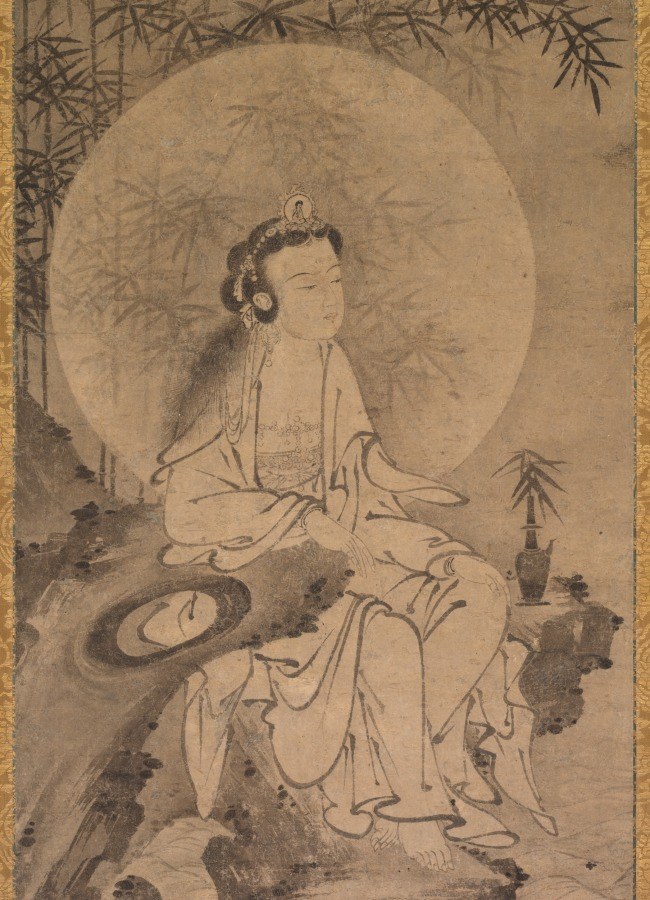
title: White-Robed Guanyin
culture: China, Southern Song dynasty (1127-1279)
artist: attributed to Zhang Yuehu (Chinese, active 1200s)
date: late 1200s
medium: Hanging scroll; ink on paper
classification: Painting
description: The figure here sits on a rocky elevation representing Potalaka in the Southern Sea, Avalokitesvara’s island home. A vase with a bamboo sprig holds pure water, the nectar of life. Bamboo shines through the figure’s halo, a way of seeing the illusionary world through the Buddhist truth. Avalokitesvara (Guanyin in Chinese), the bodhisattva of compassion, was integrated into the Chan Buddhist canon of venerated beings. In this context, the bodhisattva is often depicted in its female manifestation as the White-Robed Guanyin. The worship of the feminine White-Robed Guanyin has its origins on Mount Tianzhu in Hangzhou, where Qian Liu (852–932), ruler of the Wuyue kingdom, established the Upper Tianzhu Monastery to venerate her image.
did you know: As an artist, Zhang Yuehu was better known in Japan than in his own country.